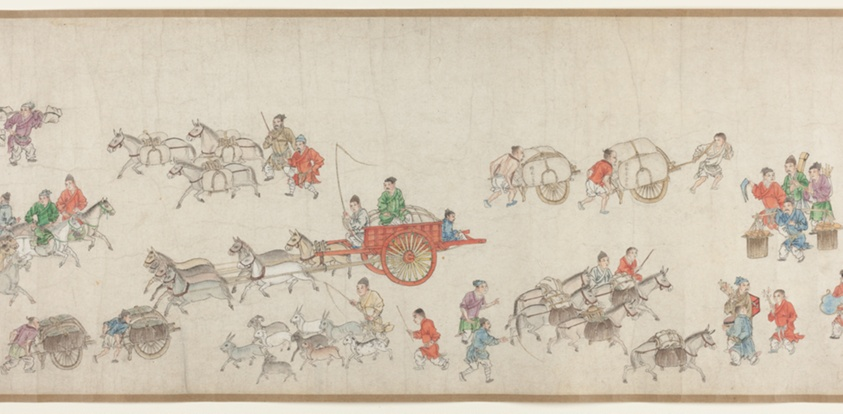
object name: Painting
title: Street Scenes in Times of Peace 太平風會圖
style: Chinese (culture or style)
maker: Zhu Yu (Zhu Junbi) 朱玉（朱君璧）; Chinese, 1293-1365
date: Yuan dynasty (1279–1368), 14th century 元朝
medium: Handscroll; ink and colors on paper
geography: China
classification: handscroll; painting; asian art